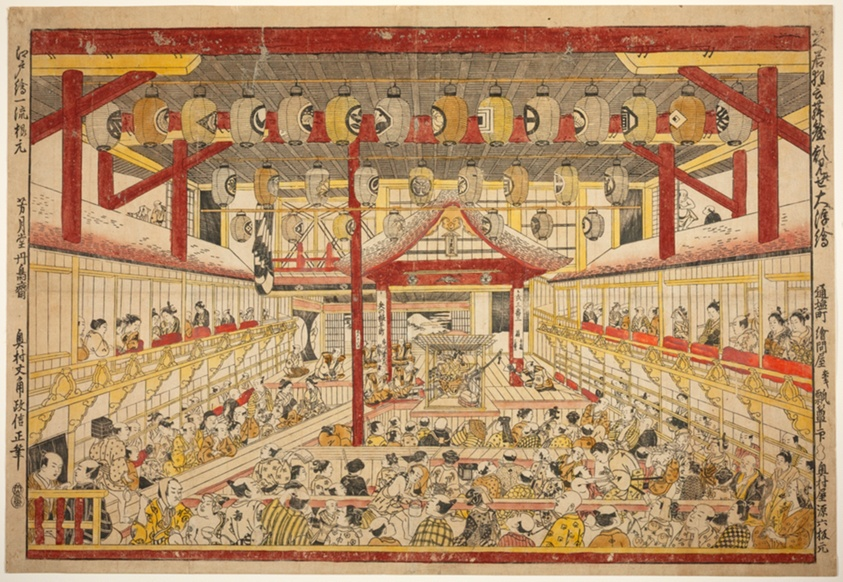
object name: Print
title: Large Perspective Picture of the Kaomise Performance on the Kabuki Stage (Shibai kyogen butai kaomise o uki-e)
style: Japanese (culture or style)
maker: Okumura Masanobu (Japanese, 1686-1764)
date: c. 1740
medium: Hand-colored woodblock print; horizontal o-oban, beni-e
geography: Japan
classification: woodblock print; print; asian art